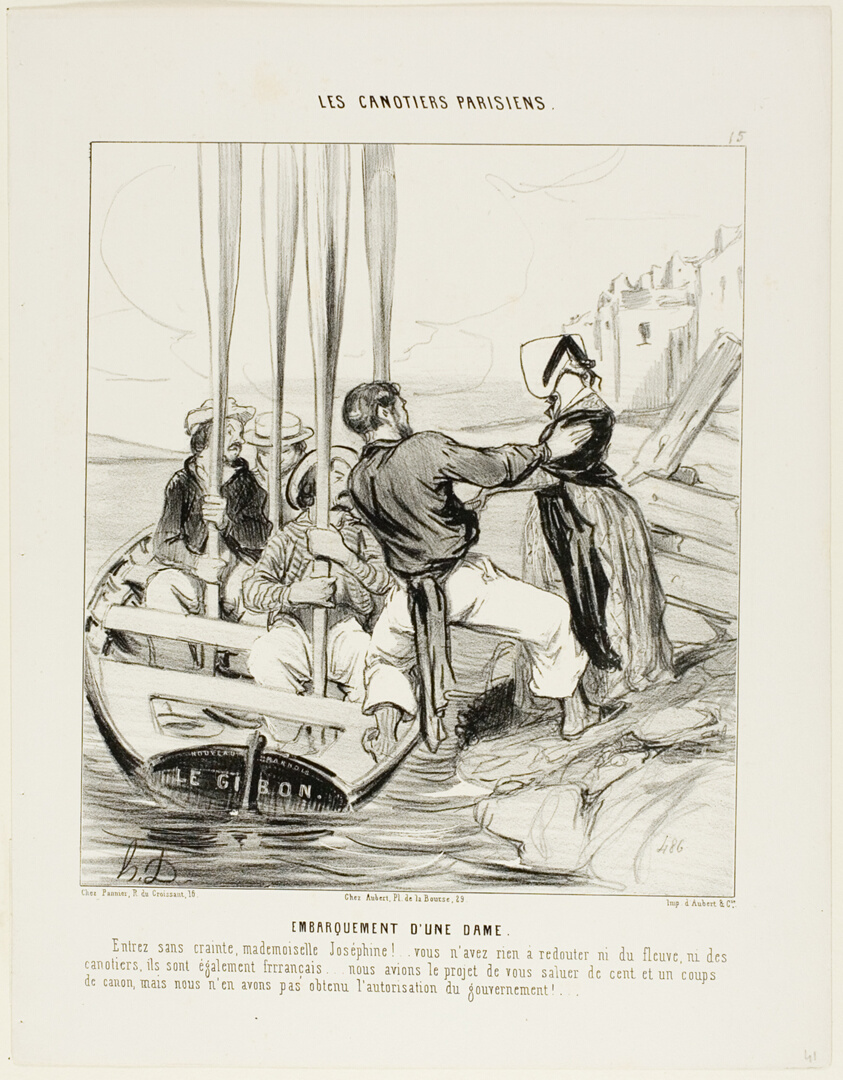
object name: Print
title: Embarcation of a Lady. “Get in without fear Miss Josephine....You don't have to be afraid from neither the current nor the boatmen... they are all Frrrrrench.... we actually wanted to salute you with 101 canon shots, but we didn't get the authorization from the Government!...,” plate 15 from Les Canotiers Parisiens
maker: Honoré Victorin Daumier; French, 1808-1879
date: 1843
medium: Lithograph in black on white wove paper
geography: France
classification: lithograph; print; prints and drawing